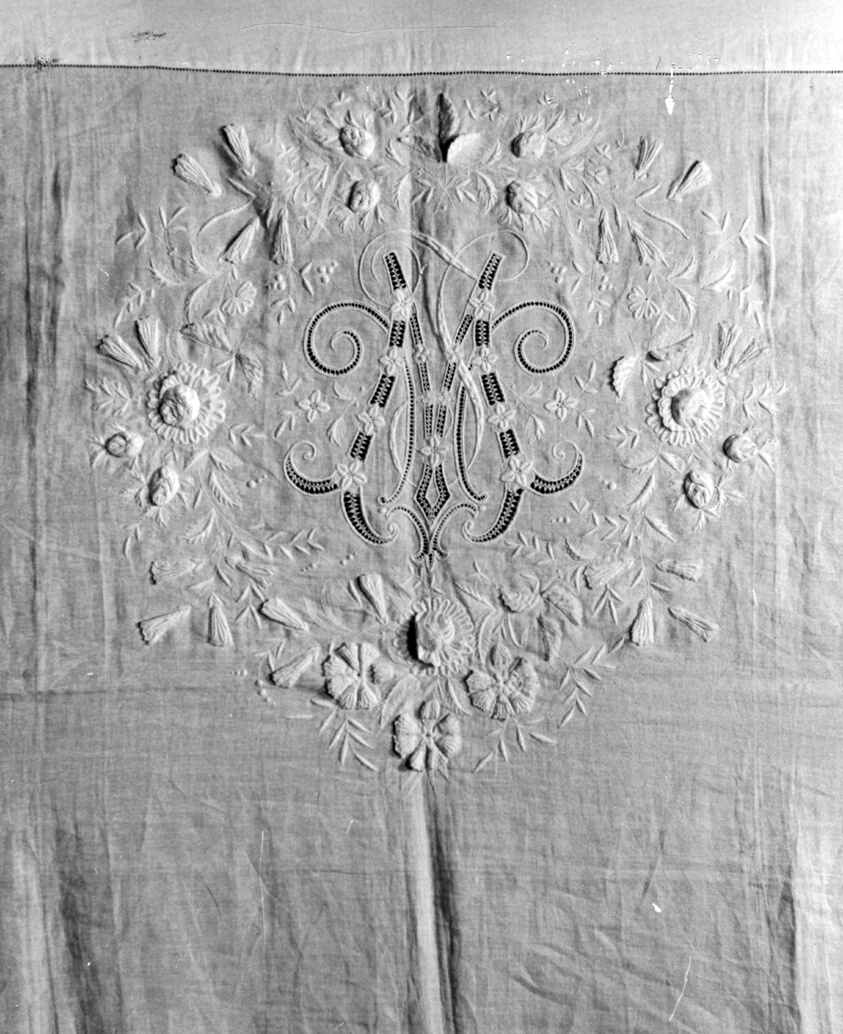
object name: Textile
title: Pillow Cover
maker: Switzerland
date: c. 1880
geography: Switzerland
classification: textile; needlework (visual works)